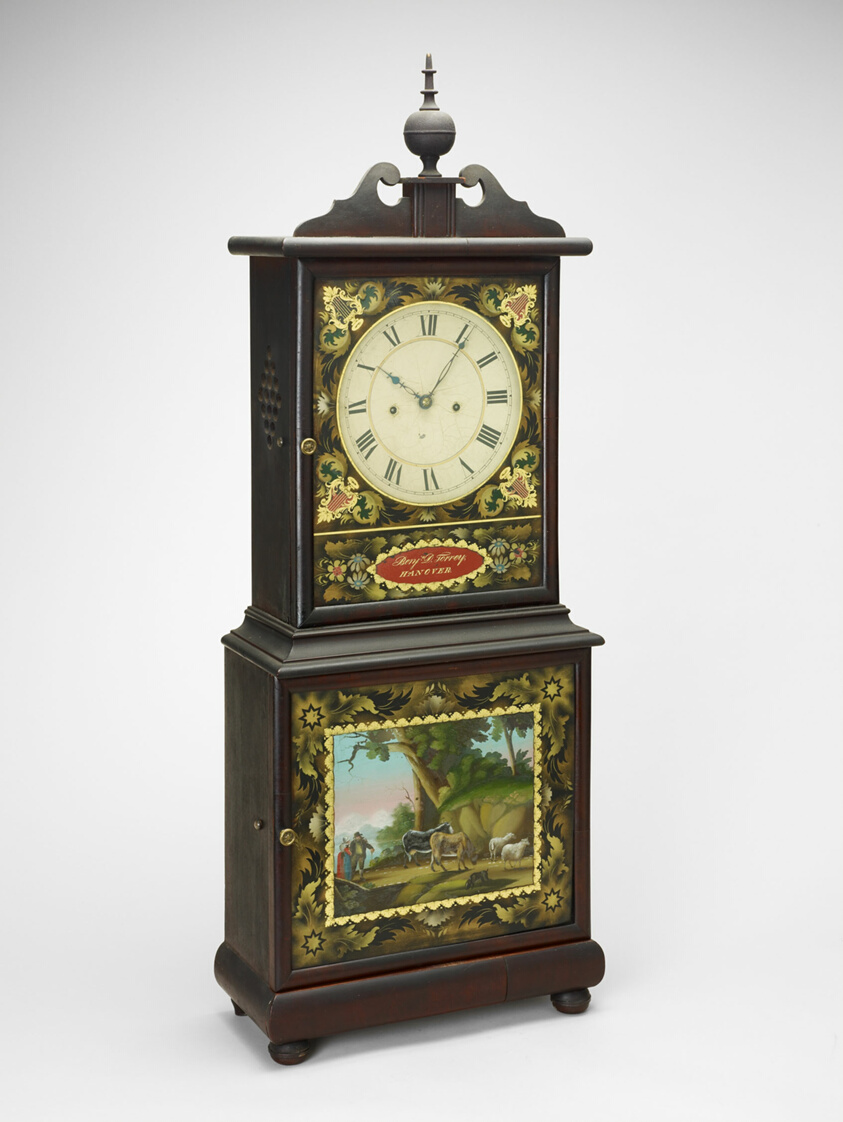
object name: Decorative Arts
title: Shelf Clock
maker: Benjamin Torrey (American, active c.1817–1843)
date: c. 1820–40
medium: Mahogany, white pine, iron, brass, painted glass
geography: United States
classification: clock; american decorative arts; decorative arts